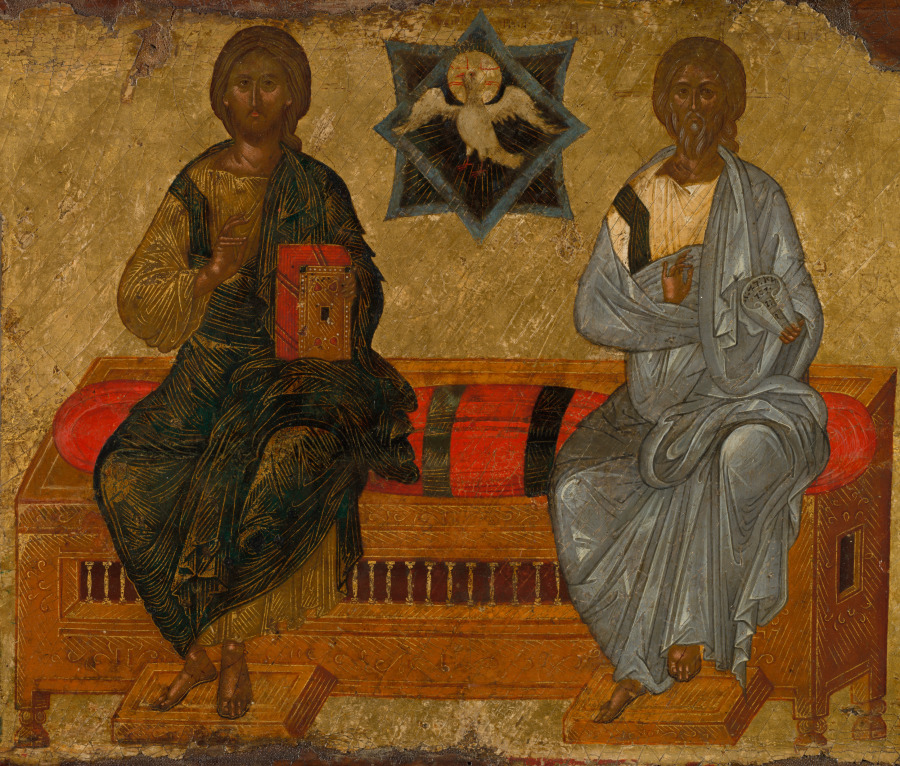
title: Icon of the New Testament Trinity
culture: Byzantium, Constantinople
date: c. 1450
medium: Tempera and gold on wood panel (poplar)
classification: Painting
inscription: Ο ΠΑΛΑΙΟC ΤΗΩ- God the Father as Christ in old age on right identified on either side of his head in gold, outlined in red.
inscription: ΤΟ ΑΙΟΝ ΠΝΑ- The Holy Spirit, identified by dove in gold outlined in red.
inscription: ΙΩCHΦ Ο ΠΟΙΗΤΗC- St. Joseph the Hymnographer identified on the left by gold letters, outlined in red.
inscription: ΚΟCΜ Ο ΠΟΙΗΤΗC- St. Kosmas the Hymnopgrapher identified on the right in gold letters in red outline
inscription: "'together with...you my God' and 'your dominion" in Scroll of Kosmas on the right.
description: This icon depicts an important subject in Orthodox Christian art, the three corresponding figures of the single godhead known as the Holy Trinity. The Trinity is represented here in a composition known as the “New Testament Trinity,” which features Christ and God the Father seated on a bench with a dove representing the Holy Spirit between them. The central field is occupied by a large wooden throne with gold highlights on which Christ (left) and the Ancient of the Days (God the Father as Christ in old age) are seated. The Holy Spirit, in the form of a dove, hovers within an eight-pointed star that signifies the eighth day, the future eon. On either side of the Trinity are two hymnographers, authors of hymns of praise, both identified by gold letters outlined in red—Saint Kosmas (about 675–752) on the left and Saint Joseph (about 812/818–about 886) on the right. They both suspend scrolls from round-arched windows. The icon likely was part of a church templon, the barrier that separated the nave from the sanctuary in an Orthodox church. It is not signed or dated; however, careful analysis of the painting’s style and technique places it in Constantinople around 1450, just prior to the city’s fall to the Ottomans in 1453. It represents a moment when Byzantine painting reached a brilliant crescendo.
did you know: More than just a breakfast food, eggs are used to make the tempera paint used in this painting.